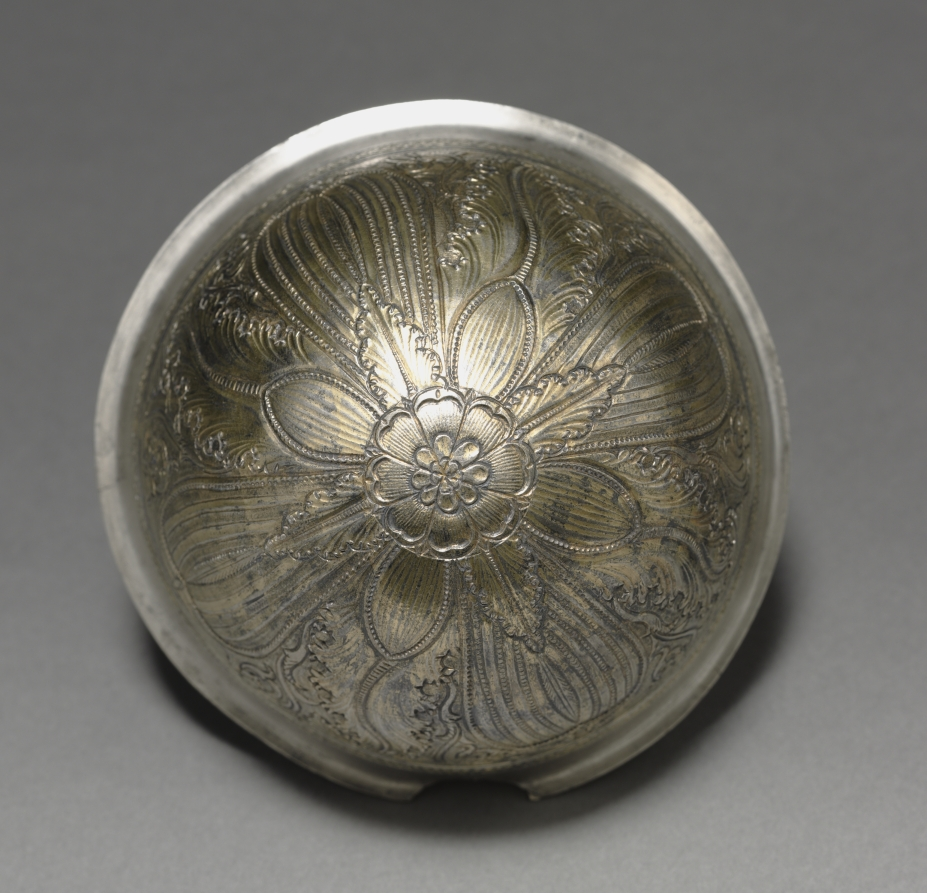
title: Bowl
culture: Greece, late Hellenistic period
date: 200–1 BCE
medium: silver gilt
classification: Metalwork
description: The exterior surface of this silver bowl is lavishly decorated with floral motifs. The bottom of the bowl is decorated with a floral design based on the lotus blossom, a popular motif in ancient Greece and Egypt. More petals and leaves radiate outward, alternating between water lily petals and acanthus leaves. Tendrils and blossoms fill the open spaces between the floral designs.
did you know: Silver-gilt, a technique of layering a thin layer of gold over silver, was used to decorate this bowl.